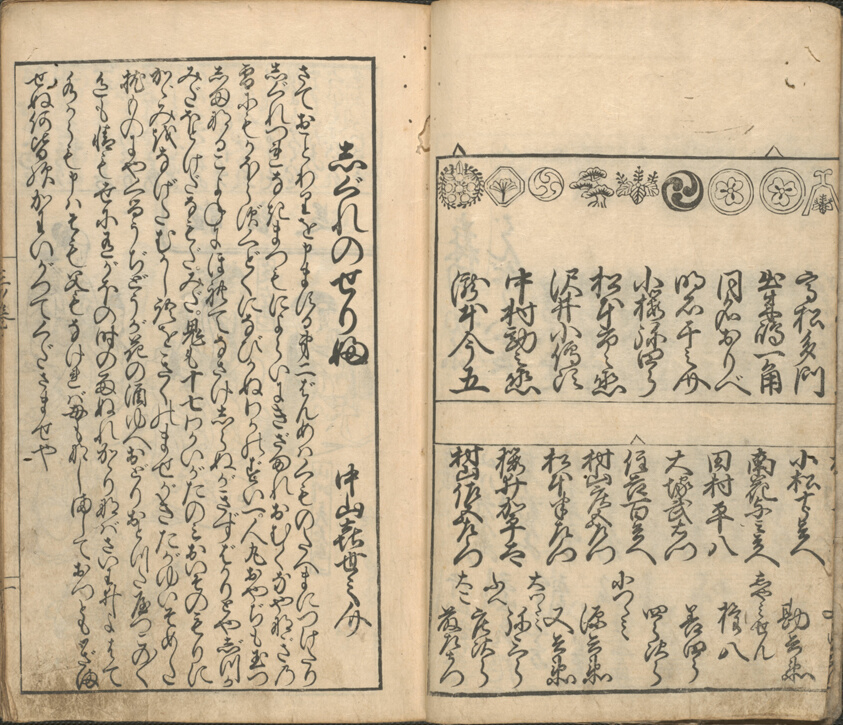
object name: Book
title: Collection of Pictures of the Actors in the Four Theatres (Shiza yakusha ezukushi), vol 2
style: Japanese (culture or style)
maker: Furuyama Moroshige (Japanese, active c. 1684-1704)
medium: Woodblock printed book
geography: Japan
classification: woodblock print; print; woodblock; book